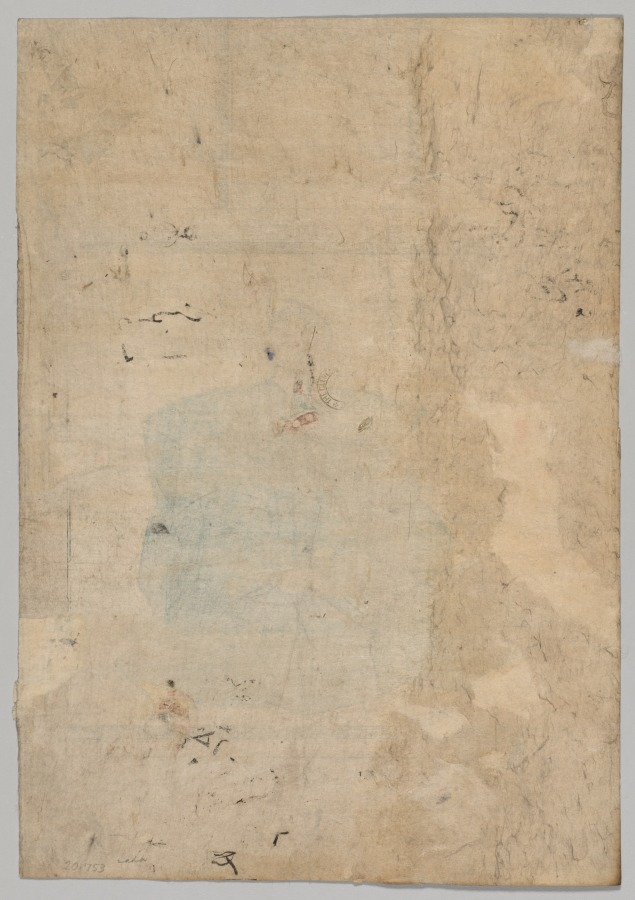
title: Portrait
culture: Japan, Edo period (1615–1868)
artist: Utagawa Kunisada (Japanese, 1786–1865)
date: 1786–1865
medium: color woodblock print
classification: Print